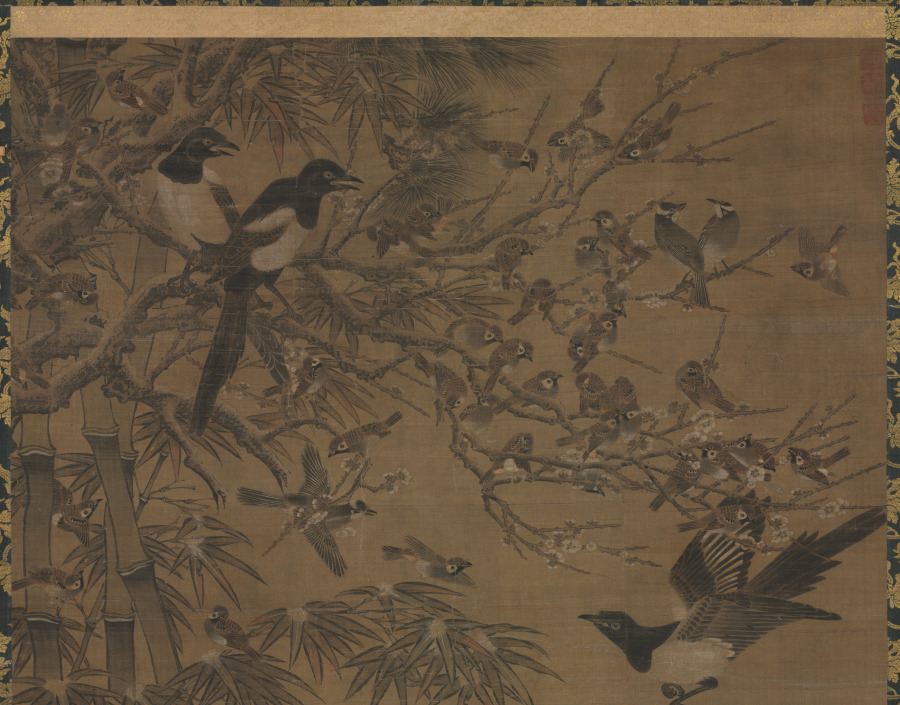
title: A Hundred Birds and the Three Friends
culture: China, Ming dynasty (1368–1644)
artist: Bian Wenjin (Chinese, about 1354–1428)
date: 1400–1425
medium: hanging scroll; ink and color on silk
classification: Painting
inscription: Artist's three seals: Pien yin Ching-chao; Sha-yang shih-chia; Ch'in shu ch'ing-lo.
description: In this hanging scroll birds rest and frolic among pines, bamboo, and flowering plum, plants known as “the three friends.” Due to their endurance in winter, they symbolize perseverance and friendship in adverse times. The naturalistic depiction of the birds refers to the bird-and-flower painting tradition of the Art Academy of the Song dynasty. The painter Bian Wenjin served at the court of the Ming dynasty Yongle Emperor (reigned 1402–24). This painting may have been hung in a private studio or palace hall on appropriate occasions.